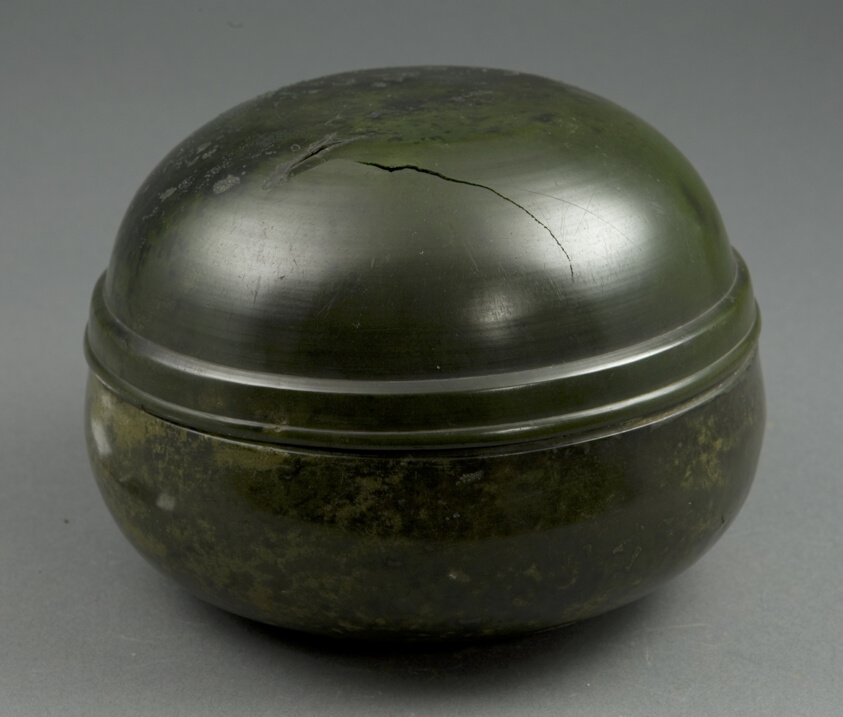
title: Covered Box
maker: Korea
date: 18th century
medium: Covered box with incised circlet banding.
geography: Japan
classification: bronze; metal; vessel; asian art